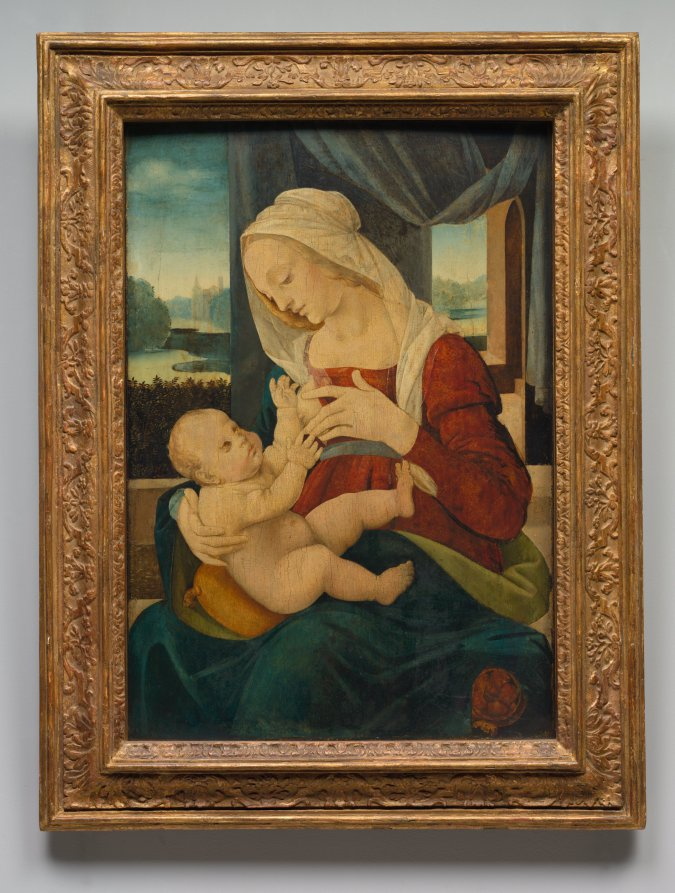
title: Virgin and Child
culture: Italy, 15th century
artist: follower of Lorenzo di Credi (Italian, 1459–1537)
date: 1400s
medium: oil on wood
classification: Painting